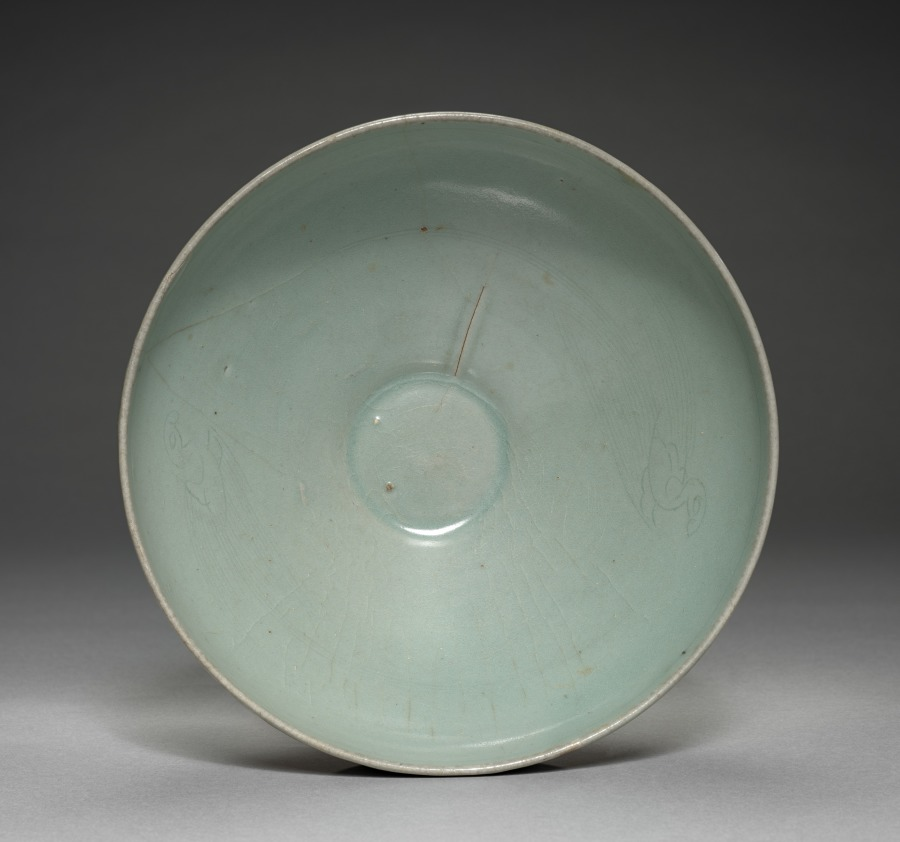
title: Bowl with Incised Parrot Design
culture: Korea, Goryeo dynasty (918–1392)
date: 1100s-1200s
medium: glazed porcelain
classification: Ceramic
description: As early as the 600s, the practice of drinking tea and wine became an important part of elite leisure culture in Korea. A wide bowl like this example was especially suitable for drinking powdered tea shaved from a compressed tea cake, the most commonly enjoyed type during the Goryeo period. The image of flying parrots inscribed on the inner wall of this tea bowl may have made the moment of drinking tea much enjoyable.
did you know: On the base of this tea bowl, three small spur marks made of bits of clay remain visible, indicating an individual protective casing of fire clay (saggar).